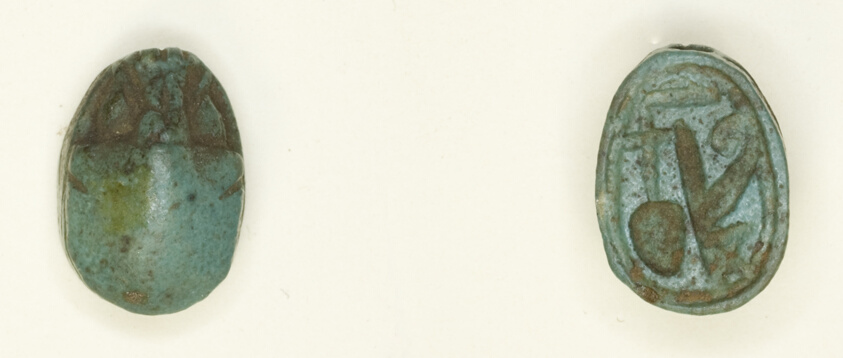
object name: Costume and Accessories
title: Scarab: Hieroglyphs (Red Crown, nfr- and nb-Signs: Trigramme of Amun)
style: new kingdom, ancient, nineteenth dynasty, eighteenth dynasty, egyptian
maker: Egyptian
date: New Kingdom, Dynasties 18–19 (about 1550–1186 BCE)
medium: Glazed steatite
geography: Egypt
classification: scarab; ancient art; costume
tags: scarab beetle, insects, Hieroglyphs